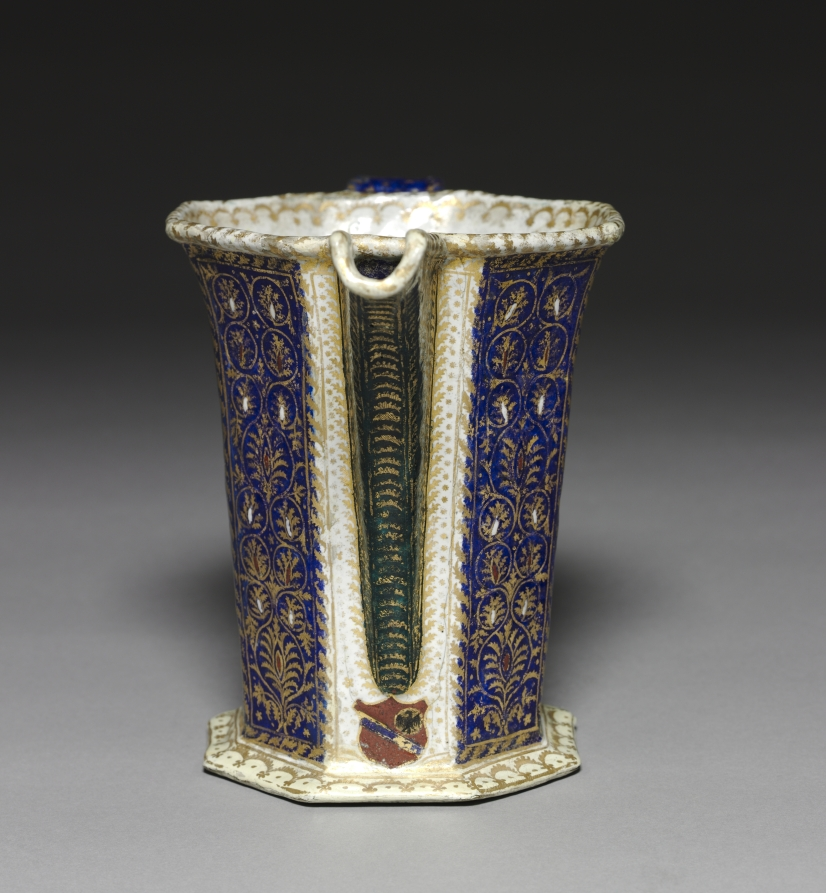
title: Ewer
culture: Italy, Venice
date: c. 1500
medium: painted enamel on copper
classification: Enamel